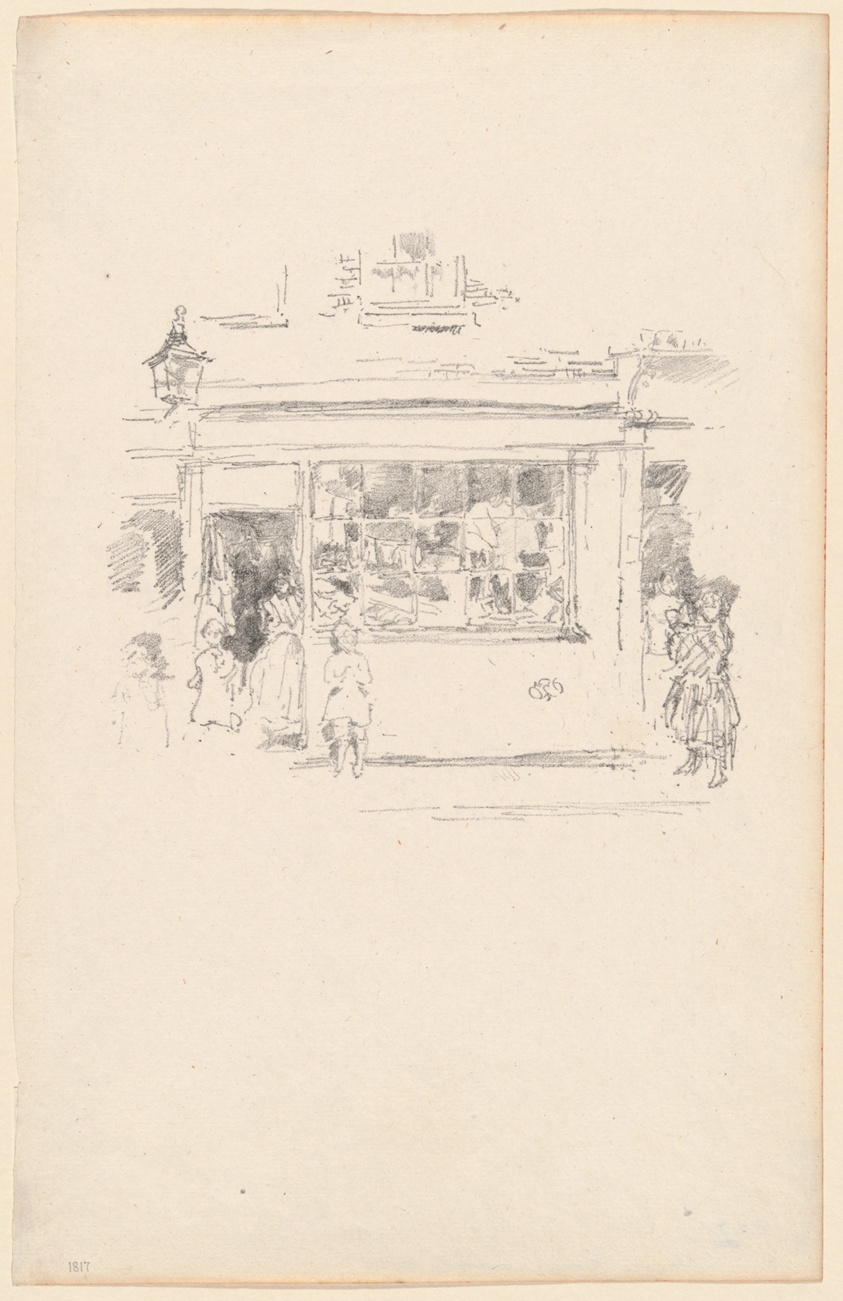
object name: Print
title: Drury Lane Rags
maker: James McNeill Whistler (American, 1834-1903)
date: 1888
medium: Transfer lithograph in black on ivory laid paper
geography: United States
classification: transfer lithograph; lithograph; print; prints and drawing; paper